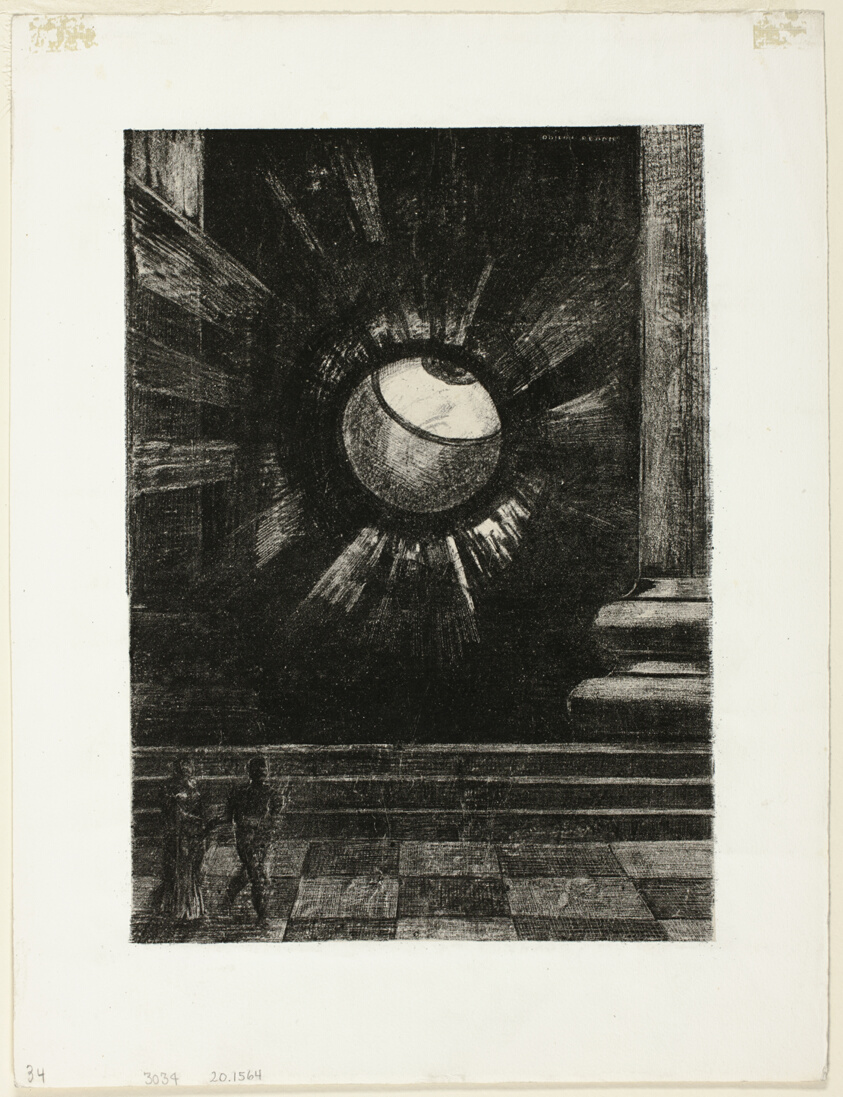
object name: Print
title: Vision, plate eight from In Dreams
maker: Odilon Redon (French, 1840-1916)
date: 1879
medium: Lithograph in black on cream China paper laid down on white wove paper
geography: France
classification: lithograph; print; prints and drawing; paper